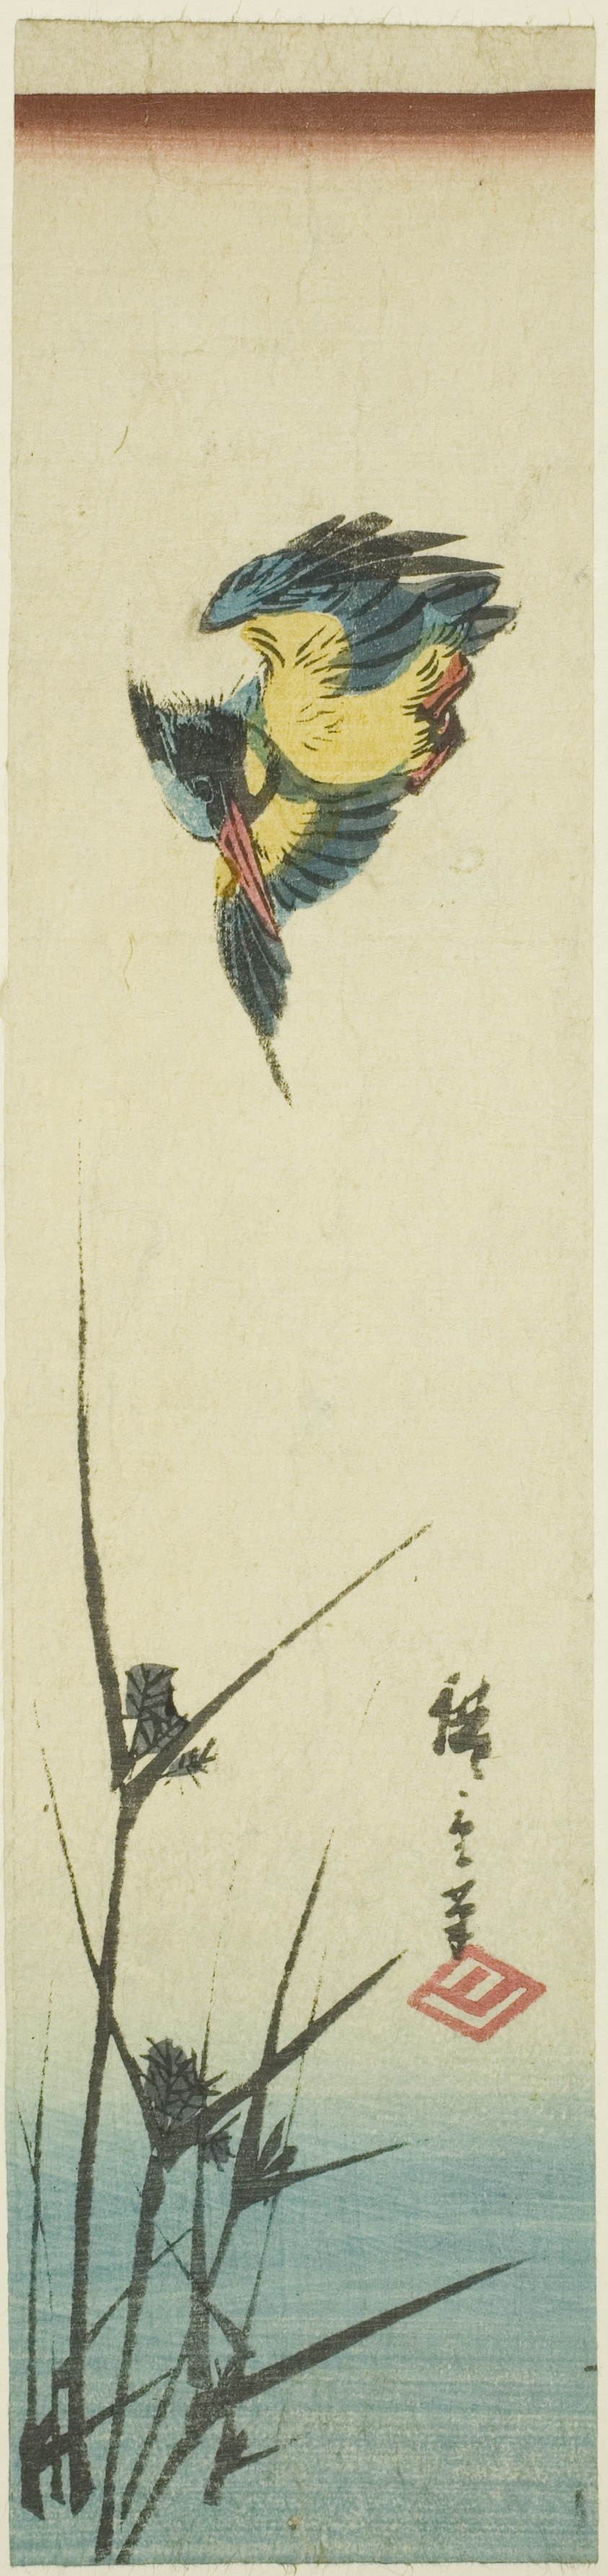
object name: Print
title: Kingfisher and reeds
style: Japanese (culture or style)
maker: Utagawa Hiroshige 歌川 広重; Japanese, 1797-1858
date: c. 1840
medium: Color woodblock print; kotanzaku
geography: Japan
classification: woodblock print; print; asian art